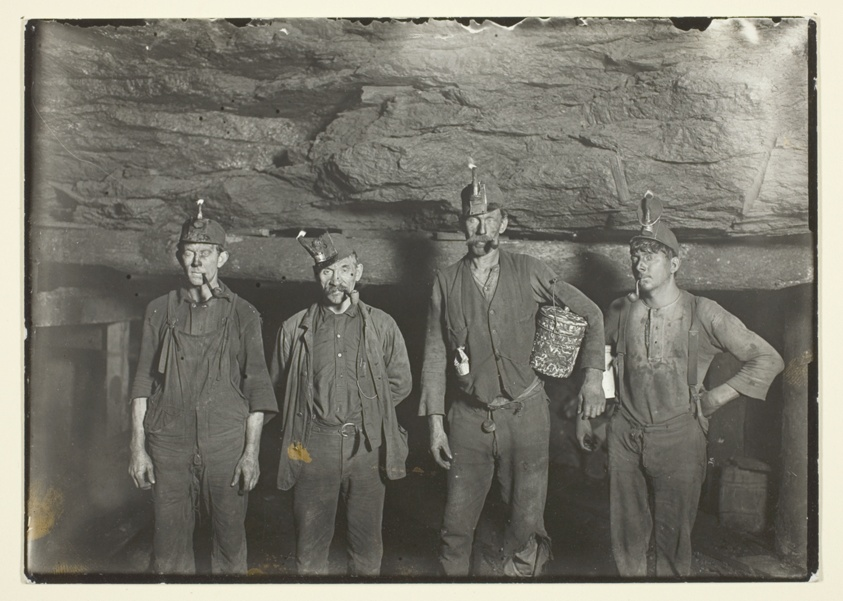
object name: Photograph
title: Deep Down In A West Virginia Coal Mine, Miners Going Home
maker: Lewis Wickes Hine (American, 1874–1940)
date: 1909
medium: Gelatin silver print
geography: United States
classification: gelatin silver (developing-out-paper) pr; photographic process; photography; photograph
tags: Collected by Hugh Edwards, documentary